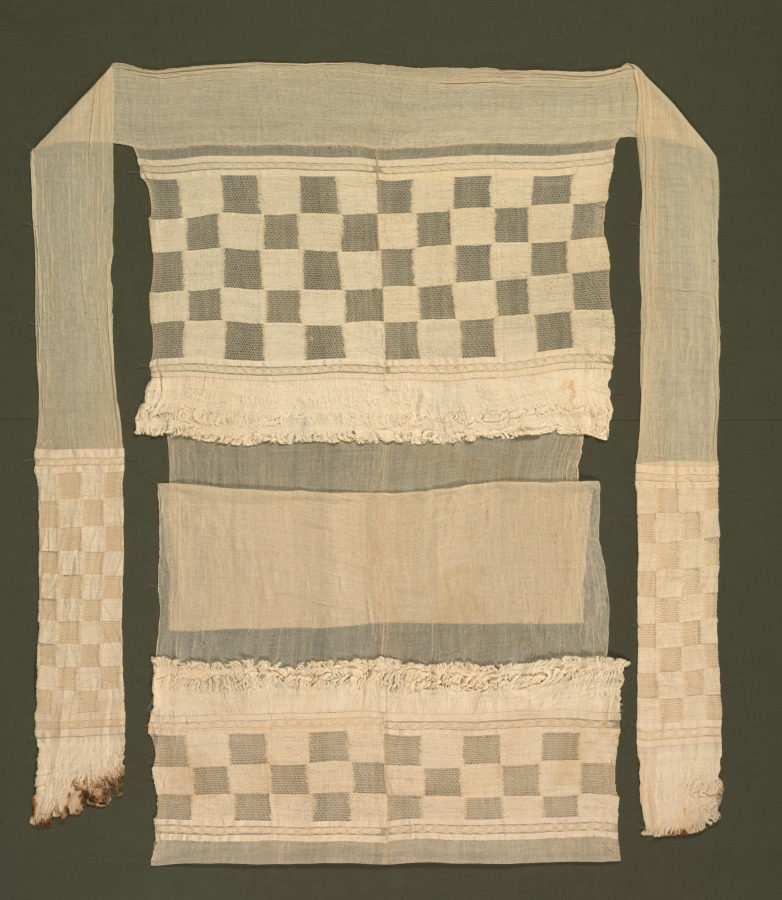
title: Loincloth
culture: Peru, North Coast, Chimú style, 1200–1460s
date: 1425–1500 (radiocarbon date, 92.3% probability)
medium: cotton; plain weave, brocaded and complex alternating gauze with 5 shots of plain weave between gauze shots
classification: Garment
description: Loincloths were basic men’s wear in ancient Peru. But the extraordinary size of some examples—this one is about eight feet long, unfolded—makes it difficult to know how they were worn, except that they were tied around the waist with the decorated panels hanging at the front and back of the body. The appearance may have been that of a billowing skirt.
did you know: This loincloth is huge!